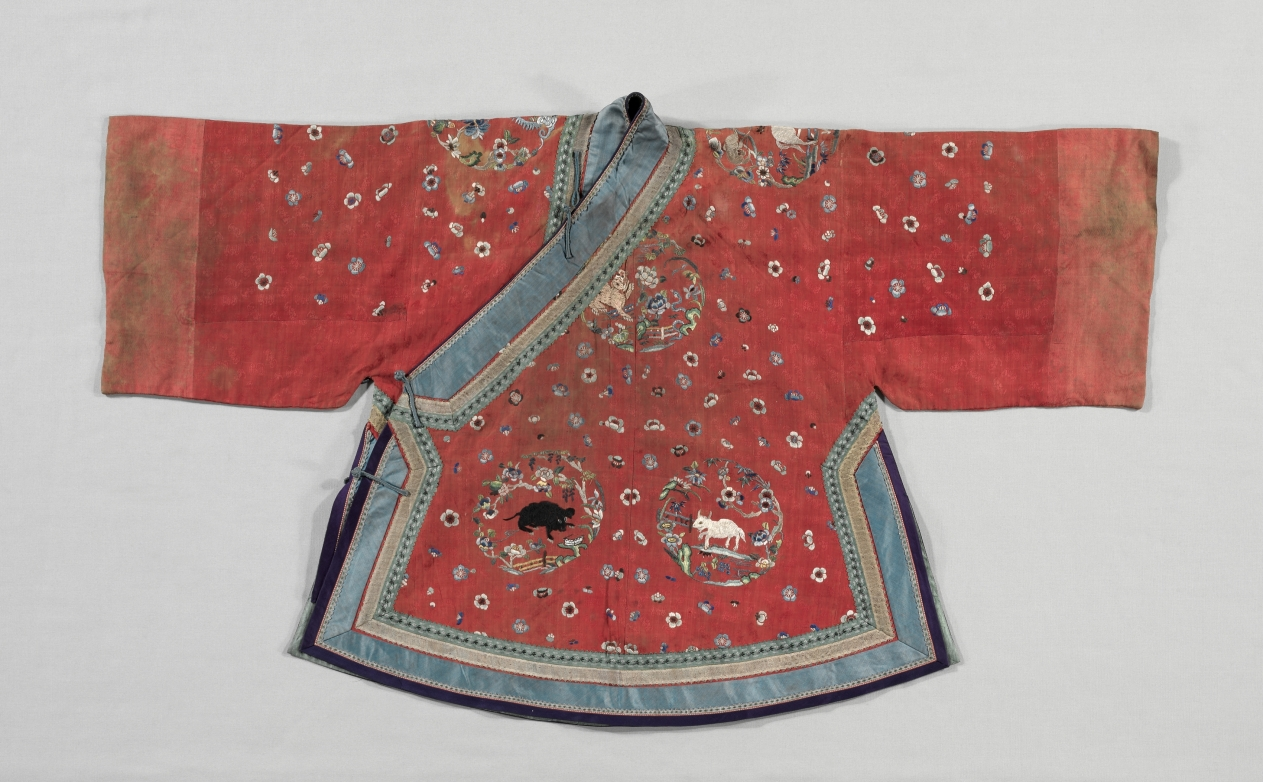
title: Embroidered Coat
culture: China, Qing dynasty (1644–1911)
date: 1800s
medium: embroidered silk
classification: Garment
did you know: This coat contains signs of the zodiac.